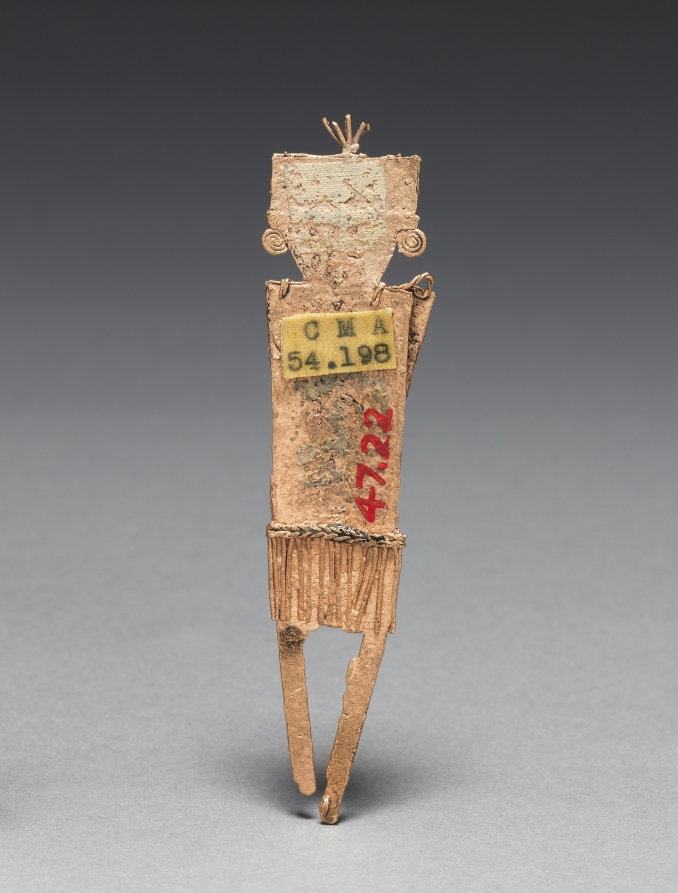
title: Tunjos (Votive Offering Figurine)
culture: Colombia, Muisca style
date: c. 900–1550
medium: cast gold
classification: Metalwork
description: Unlike the other gold ornaments made in the isthmian region, tunjos were not worn; instead, they served as offerings that were deposited in sacred places such as lagoons and caves. They often depict humans who hold something. Perhaps because they were not meant for display, tunjos were not finished after lost-wax casting. Flaws remain uncorrected, surfaces are unpolished, and gold that backed into the channel used to pour the molten metal into the mold was left in place.